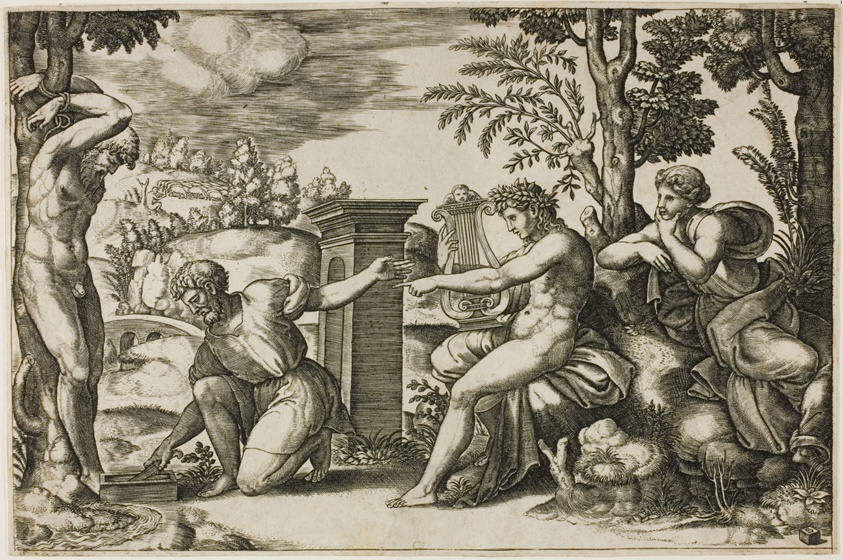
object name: Print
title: Apollo and Marsyas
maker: Master of the Die (Italian, active c. 1530-1560); after Raffaello Sanzio, called Raphael (Italian, 1483-1520)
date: c. 1532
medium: Engraving in black on paper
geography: Italy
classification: print; prints and drawing